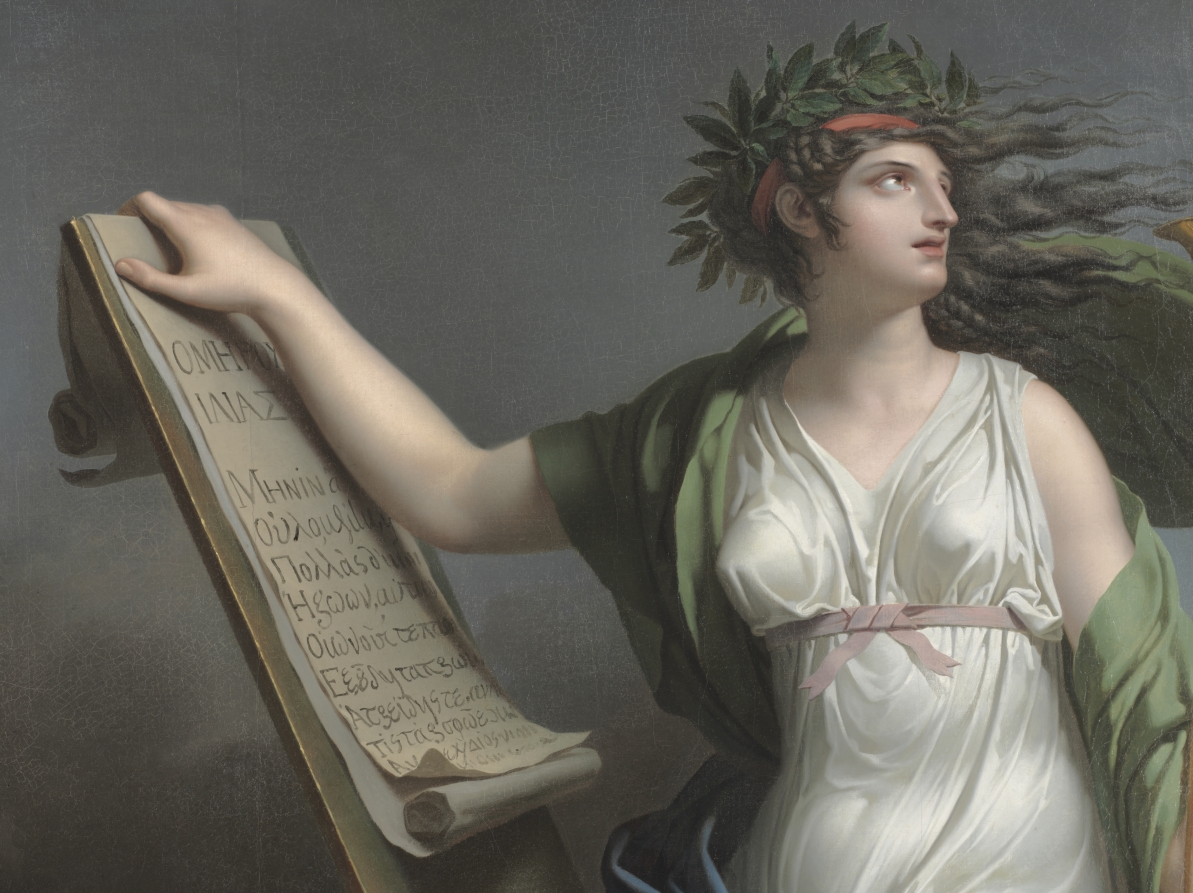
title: Calliope, Muse of Epic Poetry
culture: France, late 18th-early 19th century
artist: Charles Meynier (French, 1768–1832)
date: 1798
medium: oil on canvas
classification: Painting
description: The eldest of the nine Greek muses, Calliope was the goddess of music, song, and dance. She was also known as the goddess of epic poetry and conferred the gift of eloquence on kings and princes. She stands here before a bust of Homer, the ancient Greek poet who wrote the Odyssey and the Iliad. This painting belongs to a cycle of five works commissioned by businessman François Boyer-Fonfréde for his home in Toulouse.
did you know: Through the assistance of his brother, a famous actor of the Comédie Française, Charles Meynier studied in the studio of François André Vincent, the principal rival of the master Jacques-Louis David